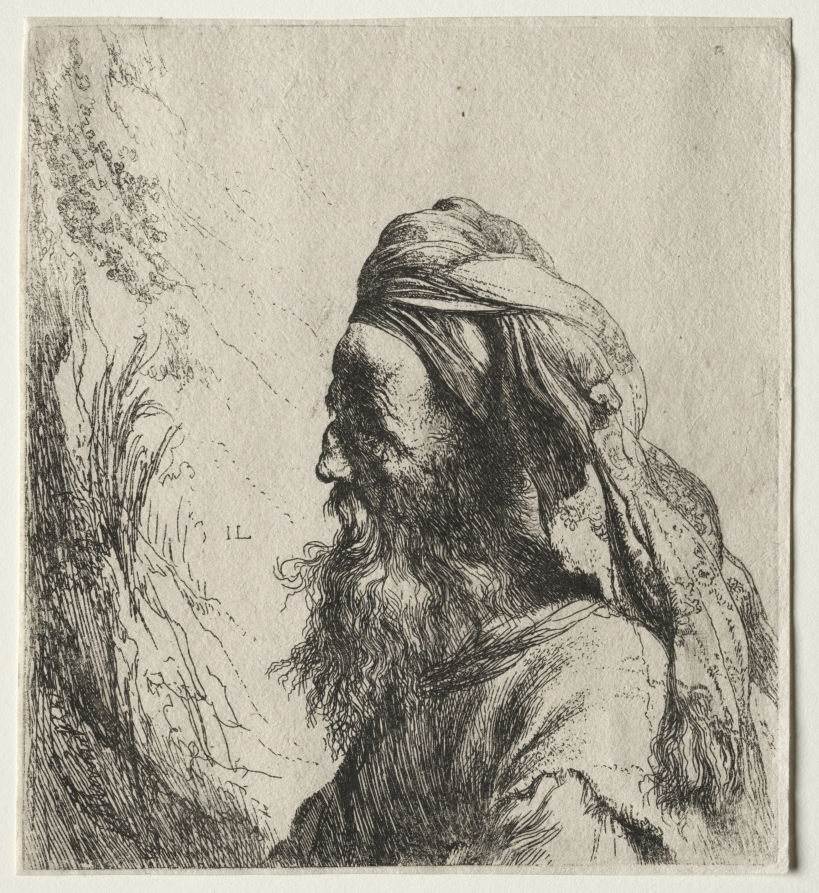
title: Head of an Oriental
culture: Netherlands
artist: Jan Lievens (Dutch, 1607–1674)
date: 1600s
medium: etching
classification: Print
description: As Europeans more actively engaged in sea travel and trade in the 1600s, references to distant locales became popular among artists. This is one of a series of head studies of men in Turkish costume created by Jan Lievens in the 1630s. He sketched this bearded, turbaned man loosely but with precise details, such as the paisley pattern, a traditional Persian design, on his scarf. While making this print, Lievens shared a studio with Rembrandt, and the artists’ shared a mutual emphasis on sketching freely with an etching needle.